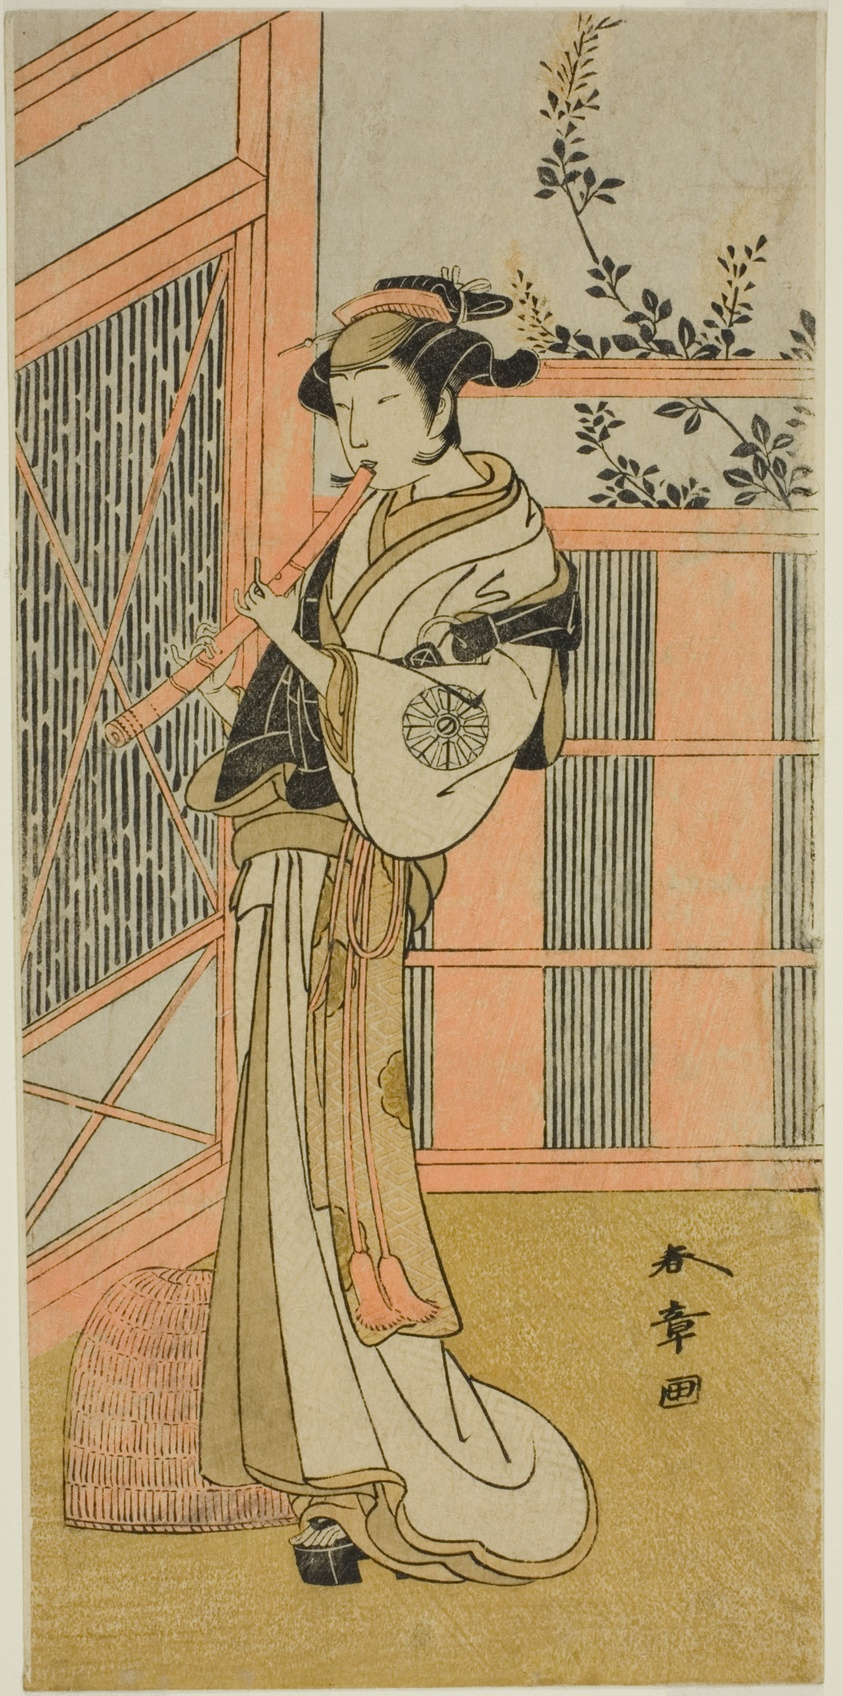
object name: Print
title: The Actor Nakamura Noshio I as Misao Disguised as a Komuso in the Play Kosode-gura no Tekubari, Performed at the Morita Theater in the Second Month, 1772 (?)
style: Japanese (culture or style)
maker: Katsukawa Shunsho 勝川 春章; Japanese, 1726-1792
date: c. 1772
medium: Color woodblock print; hosoban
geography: Japan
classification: woodblock print; print; asian art